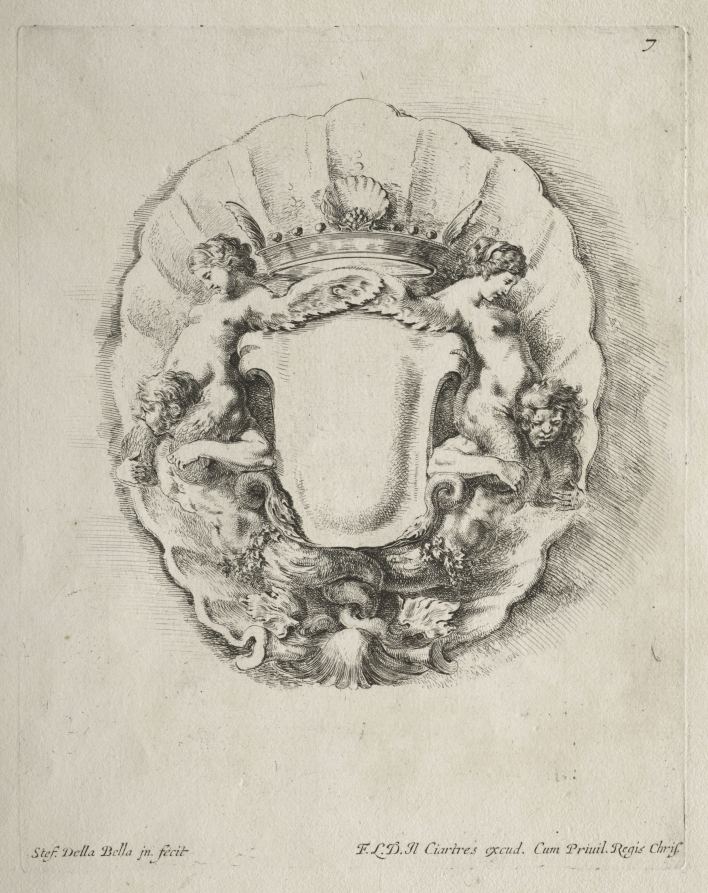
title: Collection of Various Caprices and New Designs of Cartouches and Ornaments: No 7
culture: Italy, 17th century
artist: Stefano Della Bella (Italian, 1610–1664)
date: 1646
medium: etching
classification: Print